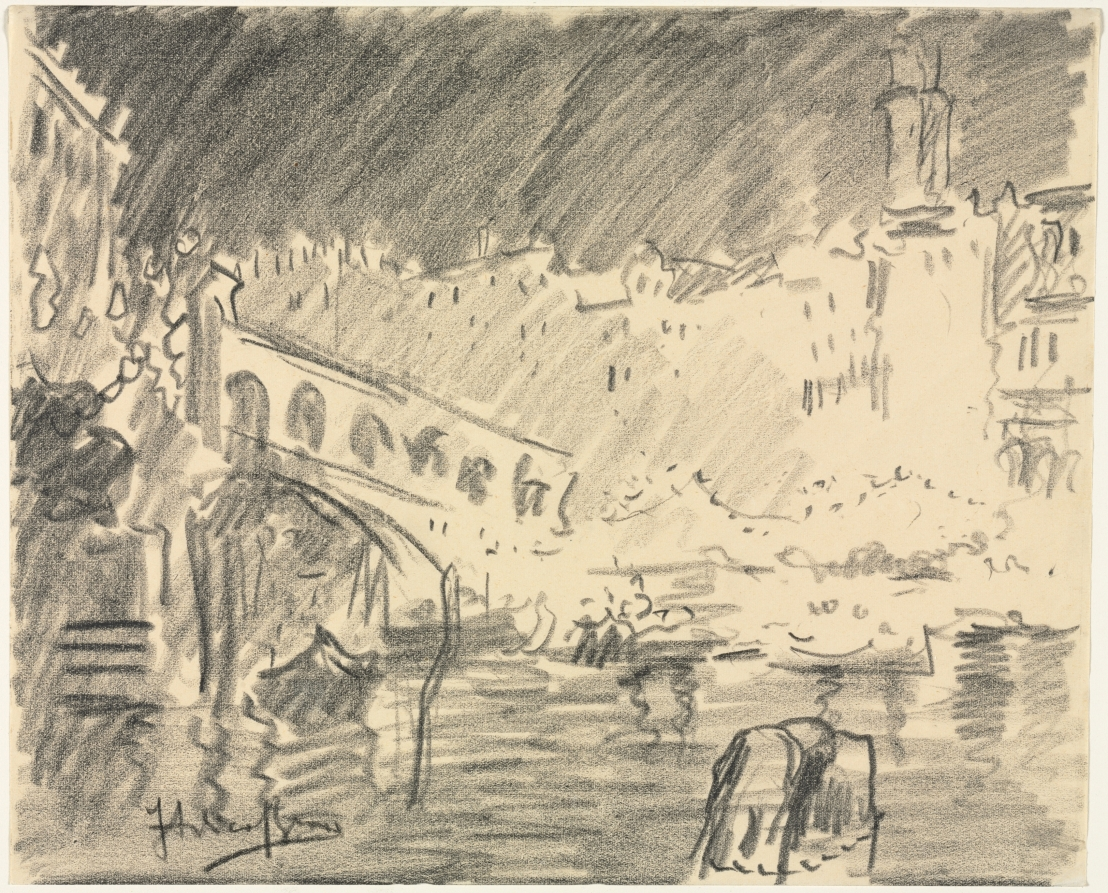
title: The Rialto Bridge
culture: Italy, 20th century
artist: Italico Brass (Italian, 1870–1943)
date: 1926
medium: black crayon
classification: Drawing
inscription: signed, lower left, in black crayon: Italico Brass